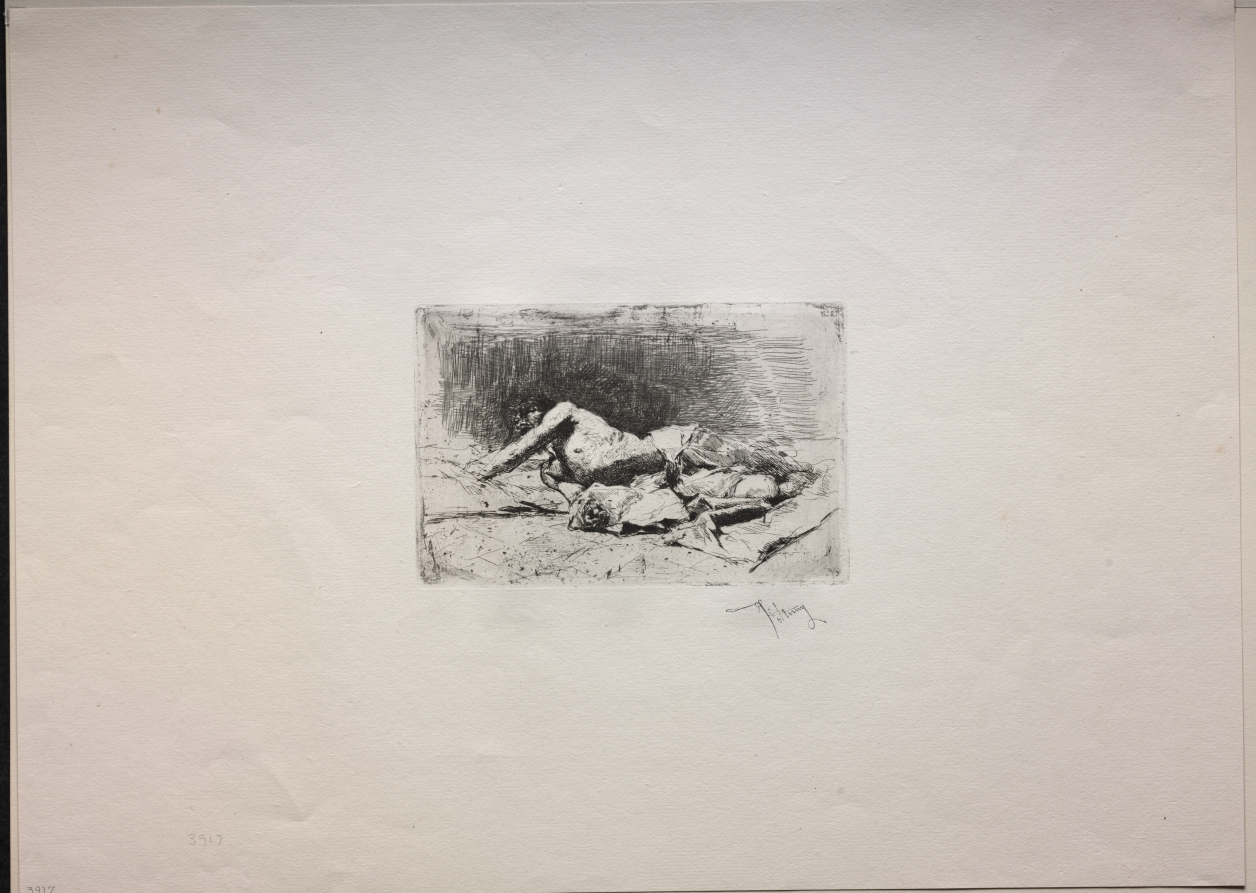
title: Man Rolling on the Ground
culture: Spain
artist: Mariano Fortuny (Spanish, 1838–1874)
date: c. 1860–70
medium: etching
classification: Print